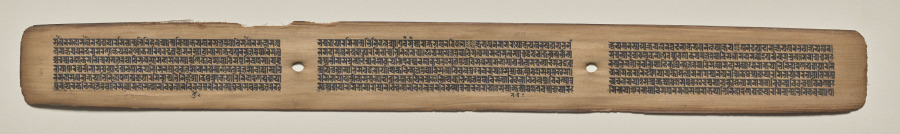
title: Text, folio 166 (recto), from a Manuscript of the Perfection of Wisdom in Eight Thousand Lines (Ashtasahasrika Prajnaparamita-sutra)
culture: Eastern India, Bihar, Vikramashila Monastery. Painting: Nepal, Kathmandu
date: Sunday, September 14, 1119 (year 239 of the Newar Samvat in the month of Ashvina)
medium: gum tempera and ink on palm leaves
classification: Painting